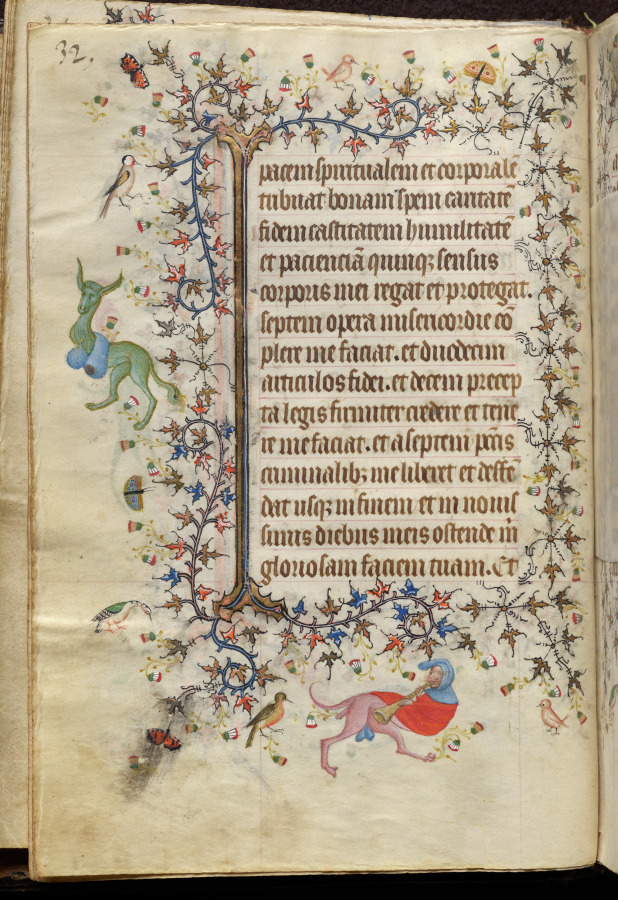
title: Hours of Charles the Noble, King of Navarre (1361-1425): fol. 16v, Text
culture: France, Paris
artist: Master of the Brussels Initials and Associates (French)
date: c. 1405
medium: ink, tempera, and gold on vellum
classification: Bound Volume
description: This precious book was highly prized by its owner, Charles III, King of Navarre, a French-born prince whose coat of arms is painted on 20 folios. Charles visited Paris on numerous occasions and likely acquired this volume there in 1404. Paris was the center of the European book trade at the time and attracted illuminators from many parts of Europe. This manuscript represents one of the most remarkable fusions of French and Italian taste in book illumination. Though conforming to Parisian standards, most of the book’s major miniatures are the work of the Brussels Initials Master, an Italian illuminator who previously worked in Bologna and Padua.